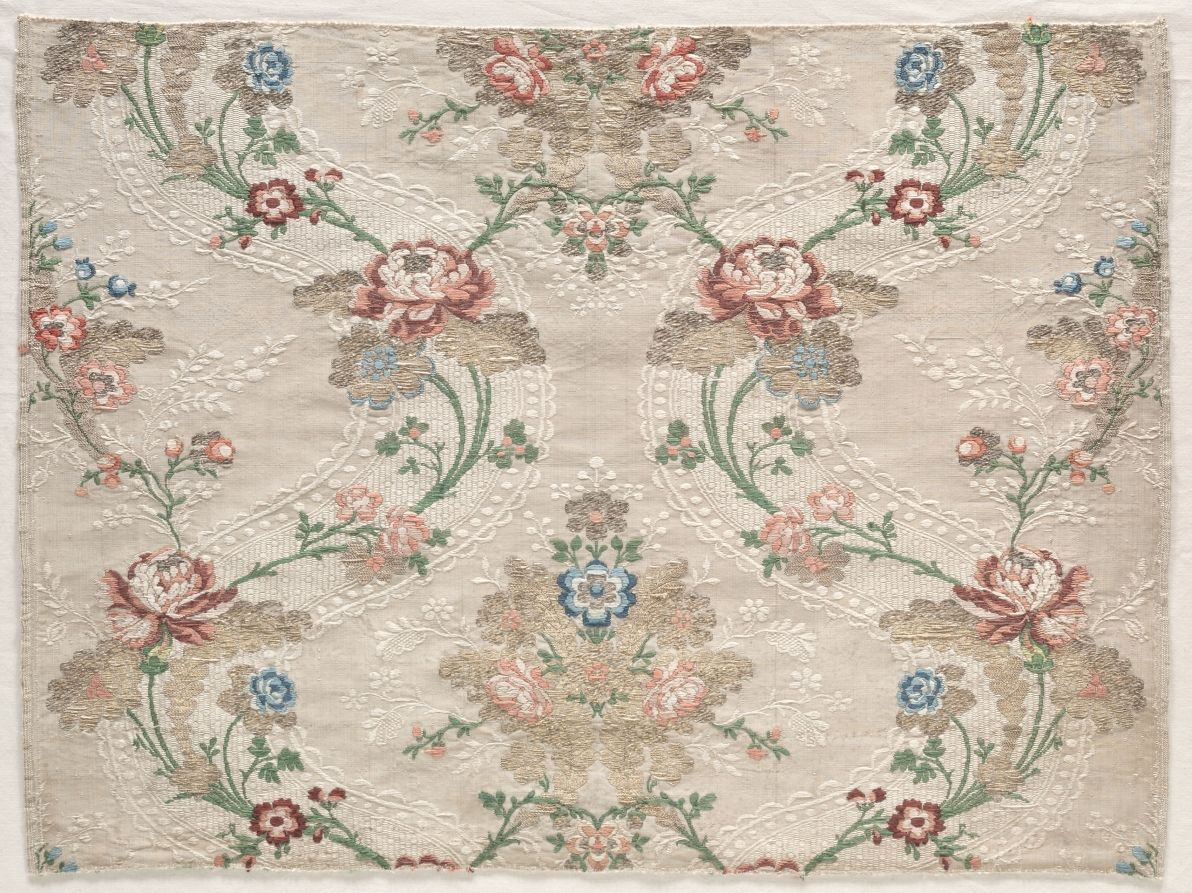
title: Taffeta Fragment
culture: France, 18th century, Period of Louis XVI (1774-1793)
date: c. 1730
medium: taffeta, warp-patterned and brocaded; silk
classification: Textile